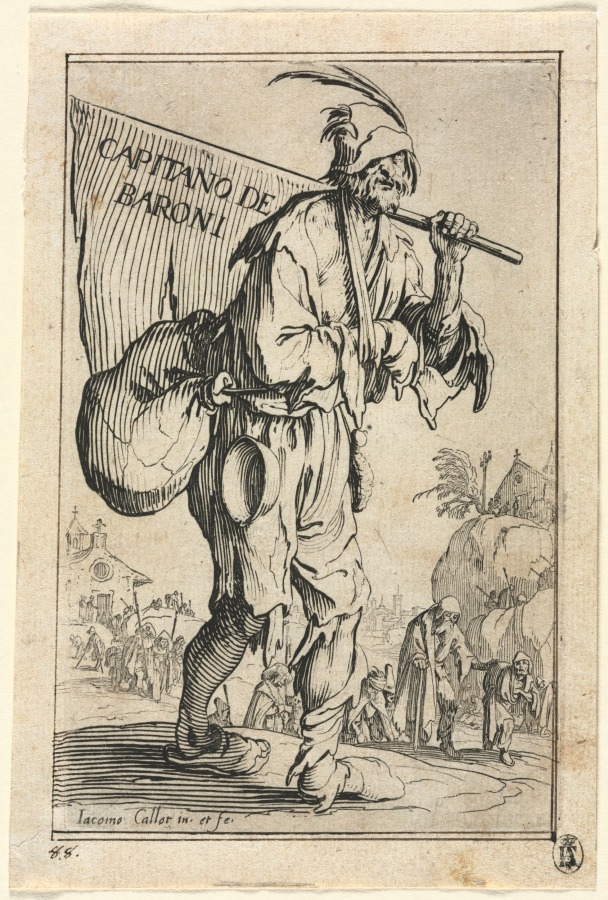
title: The Beggars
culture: France, 17th century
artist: Jacques Callot (French, 1592–1635)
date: c. 1623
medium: etching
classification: Print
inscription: Inscribed lower left in pen and brown ink: "88."